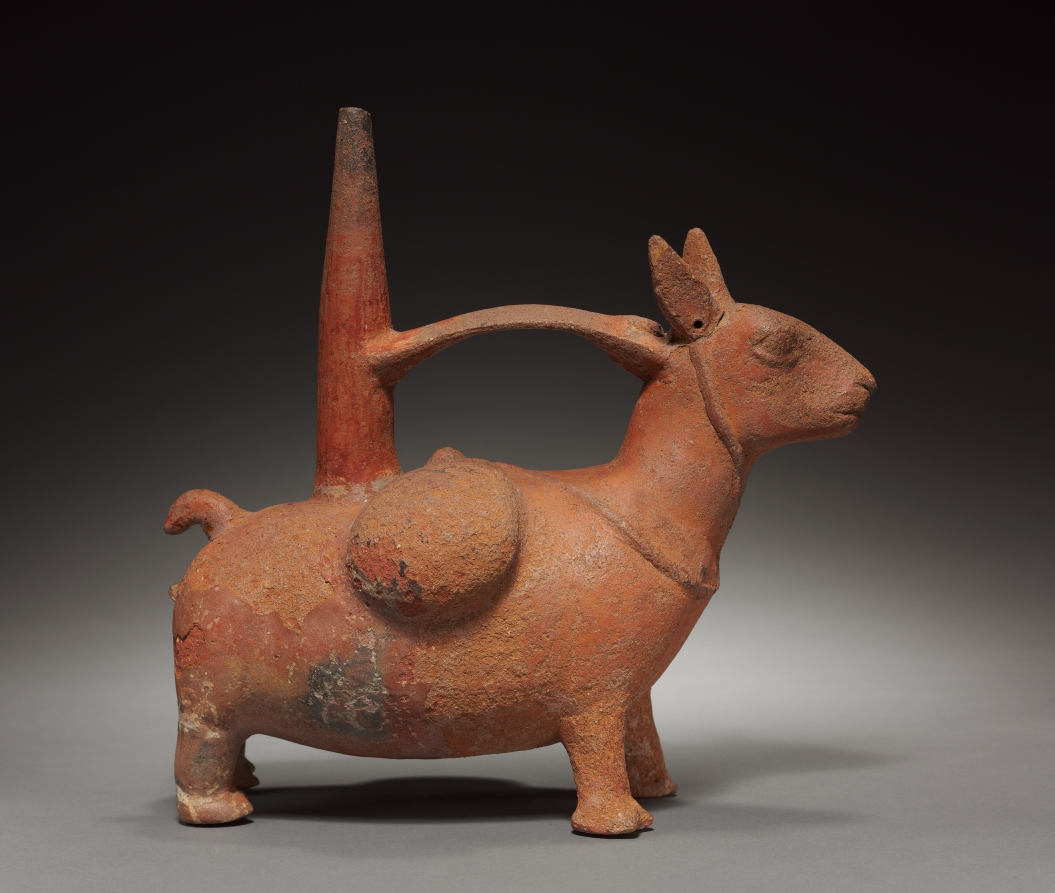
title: Llama with Packs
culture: Peru, Chimú or Inca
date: before 1532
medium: pottery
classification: Ceramic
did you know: The llama was the only burden-bearing animal, aside from humans, in ancient South America.